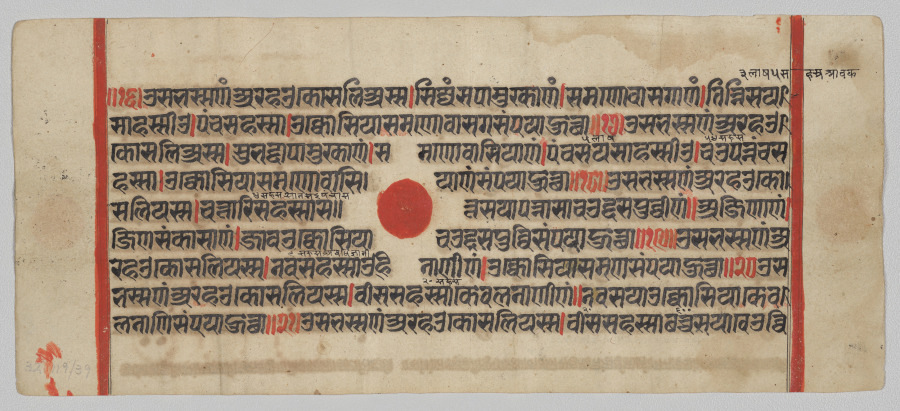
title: Text, Folio 56 (recto), from a Kalpa-sutra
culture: Western India, Gujarat, last quarter of the 15th century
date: c. 1475–1500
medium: Gum tempera, ink, and gold on paper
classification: Painting